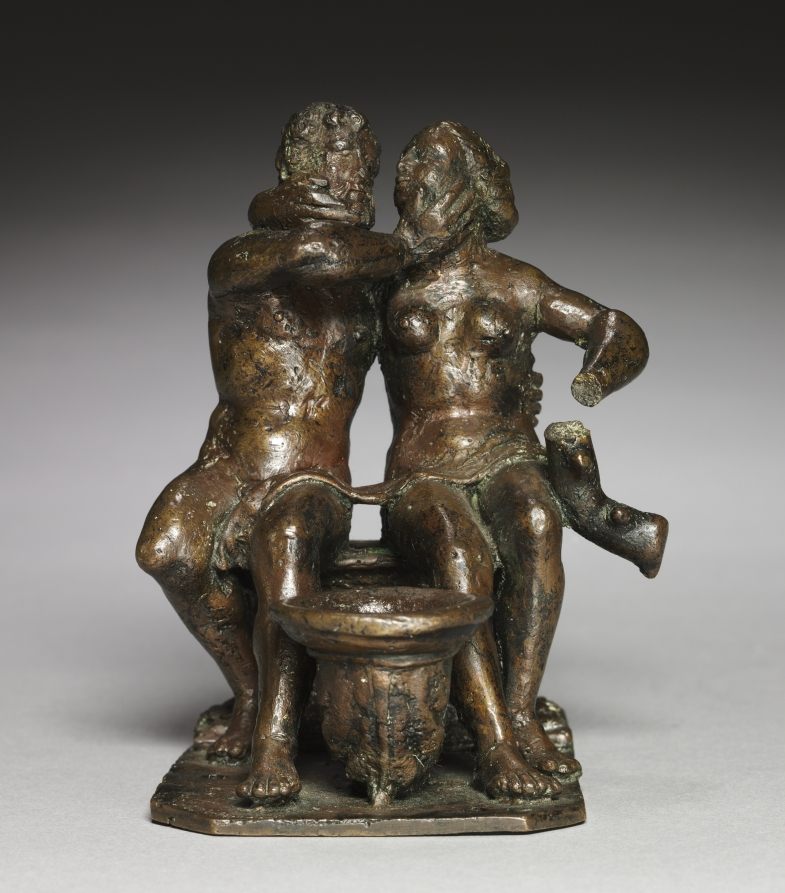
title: Adam and Eve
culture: Germany, Nuremberg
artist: workshop of Peter Vischer (German, 1487–1528)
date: c. 1520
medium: bronze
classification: Sculpture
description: The figures of Adam and Eve embrace on a bench. Together, the figures straddle an upright cornucopia that is meant to serve as an inkwell. The drapery strewn across the figures' laps—and thus covering their genitals—suggests that the scene takes place after the Fall. One can see a remnant of the Tree of Life to the right of Eve. Numerous bronze inkwells of the period survive, though they usually feature a single figure, usually allegorical, and not such an elaborate composition as seen here. This inkwell was formerly in the collection of the Duke of Arenberg, a noble house of the Habsburg Netherlands. The Vischers (Hermann I, Peter the elder, Hermann II, Peter the younger, Hans, Jakob, Paulus, and Georg) were the most renowned bronze casters of Renaissance Nuremberg, and had drawn patrons from across Europe. Because of certain ambiguities in its style, in the past the inkwell had been attributed to Georg Vischer. Stylistically, it resembles some of the miniature figures in Peter Vischer the younger's Shrine of St. Sebald (Church of St. Sebald, Nuremberg), portions of which had been cast at approximately the same time. South German bronze foundries in the sixteenth century would often adapt stylistic elements of Venetian bronzes to suit local tastes, and this inkwell is a product of this phenomenon.